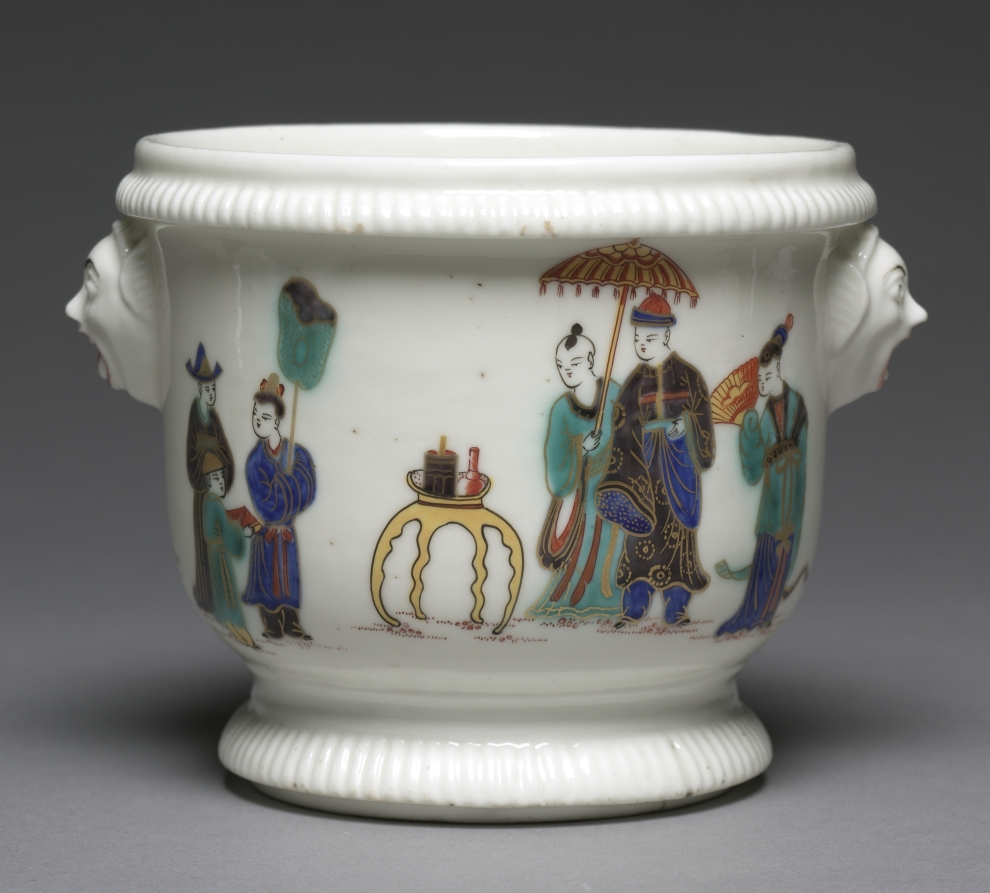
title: Bottle Cooler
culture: France, Saint Cloud, 18th century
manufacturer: Saint Cloud Porcelain Factory (French)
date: c. 1725– 1735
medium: soft-paste porcelain with enamel decoration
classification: Ceramic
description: The form of these cachepots is entirely typical of Saint-Cloud porcelain of about 1725. Their decoration, based upon Chinese porcelains of the so-called "famille-verte" type, is most unusual. Polychromed enamels were not often employed on Saint-Cloud porcelains, and figural scenes are very rare.